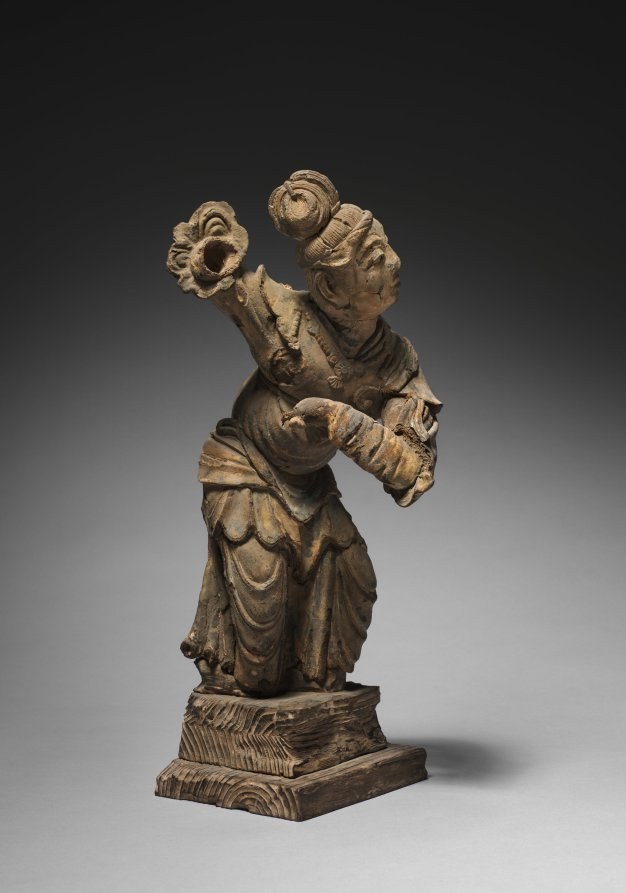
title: Dancing Apsaras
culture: China, late Tang dynasty (618–907) to Five dynasties (907–960)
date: 900s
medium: dry lacquer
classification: Sculpture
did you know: The sculpture was made from a rare technique involving alternate layers of cloth and lacquer, modeled on an armature or around a removable clay core.